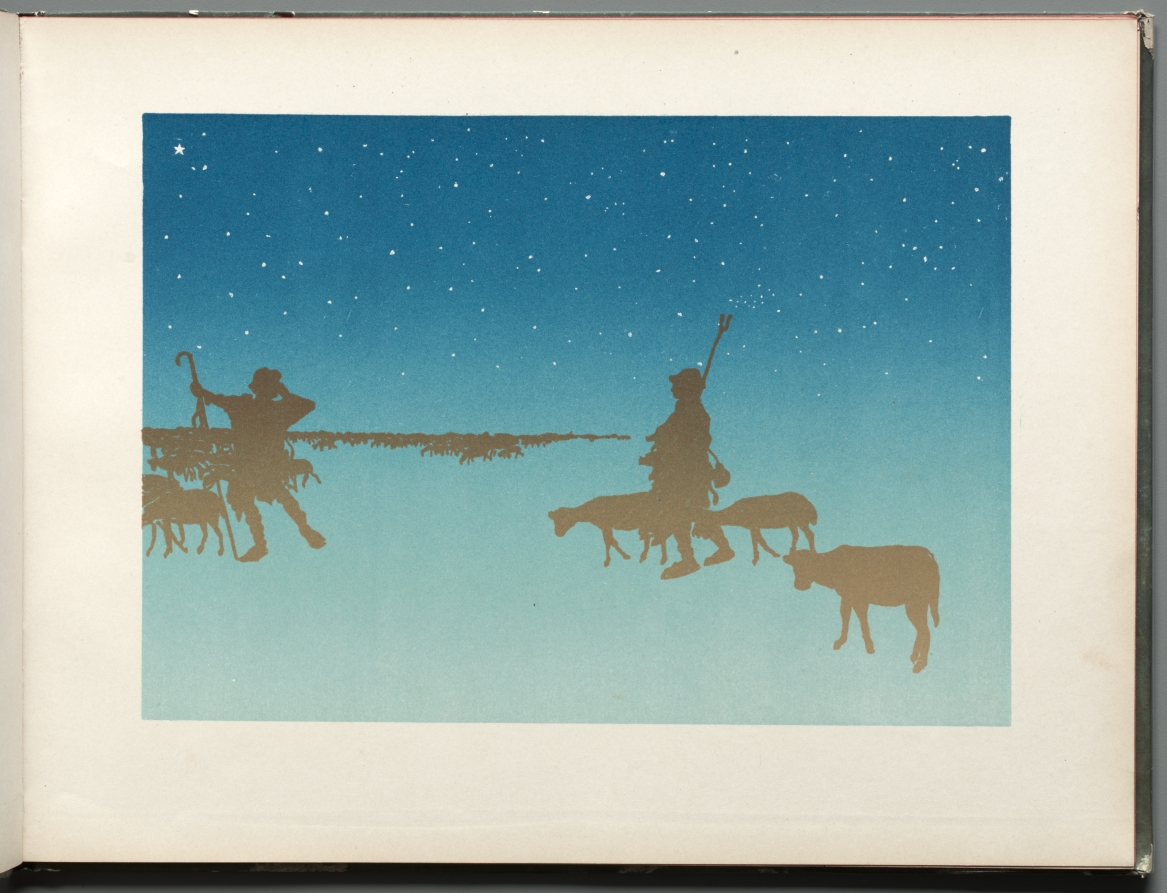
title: The Progress of the Stars: Les Bergers (Suite)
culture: France, 19th century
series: Bound Volume illustrating the poetry and music of Georges Fragerolle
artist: Henri Rivière (French, 1864–1951)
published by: C. Marpon & Flammarion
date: 1890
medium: 18 color lithographs in a Bound Volume illustrating the poetry and music of Georges Fragerolle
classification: Bound Volume